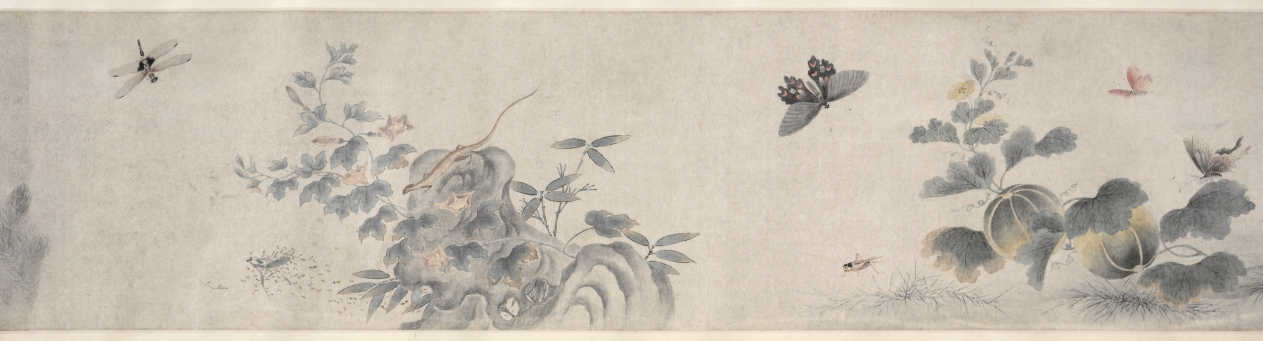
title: Insects and Flowers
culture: China, Qing dynasty (1644-1911) or Republican period (1912-49)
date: c. 1900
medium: Handscroll, ink and color on paper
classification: Painting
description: More than 26 feet long, this scroll presents insects, reptiles, and plants in delicate brushwork and pale colors, referring in style to earlier Southern Song dynasty (1127–1279) bird-and-flower paintings. Upon closer inspection, ants dismember a butterfly and reptiles wait to ambush their prey. An inscription at the end of the painting gives us an idea of its meaning: Attributed to the Qing dynasty scholar Zhang Xigeng (張錫庚, 1801–1861), the inscriber relates the work to an earlier painting by Qian Xuan (錢選, c. 1235–before 1307) and further suggests that the painting may allude to the relentlessness of natural selection. By drawing a parallel to tumultuous episodes in Chinese history, the writer might even hint at the domestic rebellions and the aggression of Western powers against China in his lifetime, particularly the Opium Wars (1839–60).